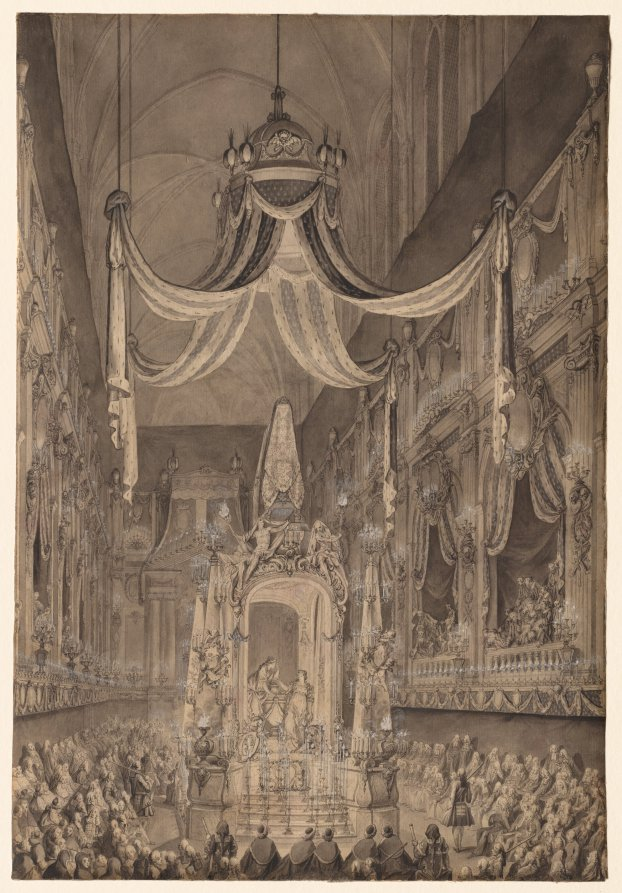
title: Funeral for Marie-Thérèse of Spain, Dauphine of France, in the Church of Nôtre Dame, Paris, on November 24, 1746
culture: France, 18th century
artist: Charles-Nicolas Cochin (French, 1715–1790)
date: c. 1746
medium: Pen and black ink and gray wash heightened with white gouache on cream laid paper, incised (with graphite) for transfer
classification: Drawing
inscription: on scrap of old mount, now removed, in eighteenth-century hand, in brown ink: C. N. Coc[hin] [abraded] filius delineavit. Novemb. 1746.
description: As an official draftsman to the king, Charles-Nicolas Cochin was responsible for documenting royal events, festivities, and ceremonies. When the Spanish princess Marie-Thérèse, wife of Louis XV’s eldest son, died in childbirth, she was given two lavish funerals: one at the Church of Saint Denis, and another, represented in this drawing, at Notre Dame in Paris. Cochin’s drawing shows how the interior of the gothic cathedral was theatrically redecorated in the current rococo style. Beneath the majestic canopy in the center of the nave, an ornate arched structure, a baldequin, contains the princess’s coffin.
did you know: Charles-Nicolas Cochin worked closely with the branch of the royal household charged with organizing and presenting royal ceremonies to produce prints such as the one related to this drawing.